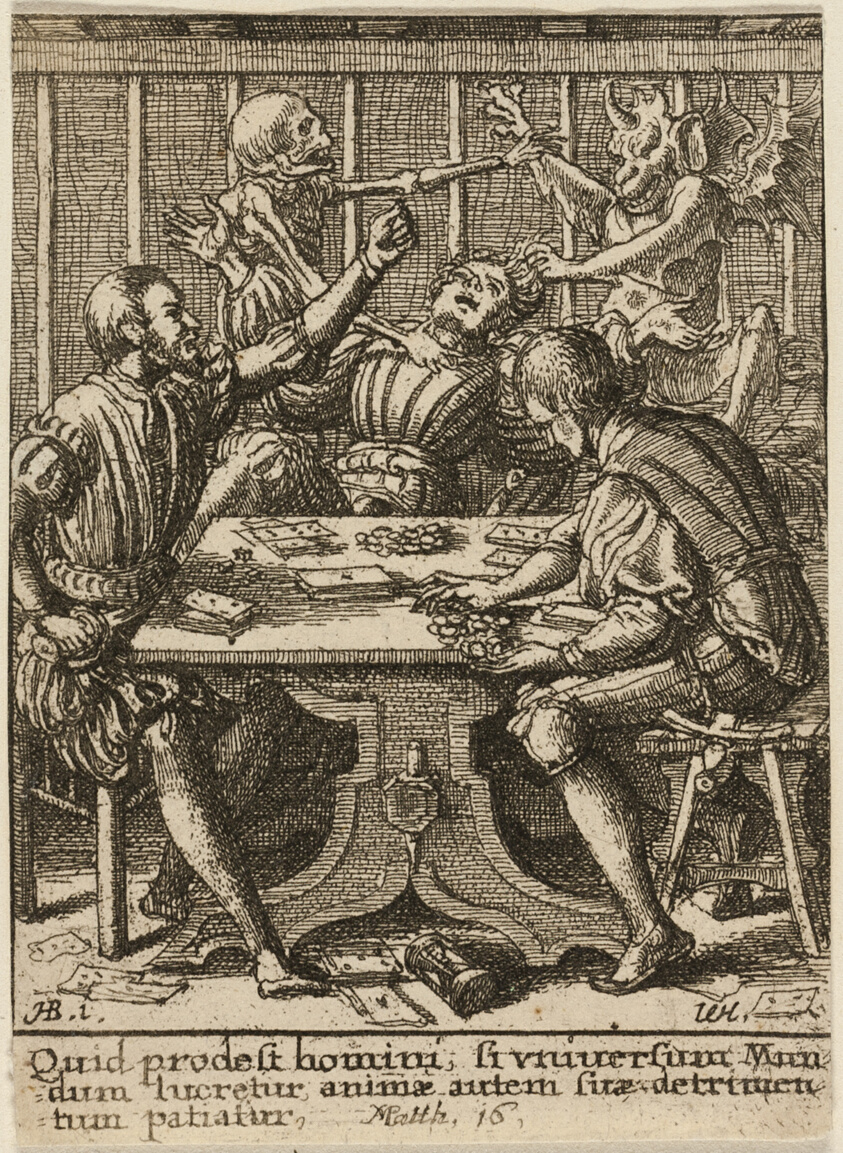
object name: Print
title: The Gamesters and Death, from The Dance of Death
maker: Wenceslaus Hollar (Bohemian, 1607-1677); after Hans Holbein the younger (German, c.1497-1543)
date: 1651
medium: Etching in black on ivory wove paper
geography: Bohemia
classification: etching; print; prints and drawing